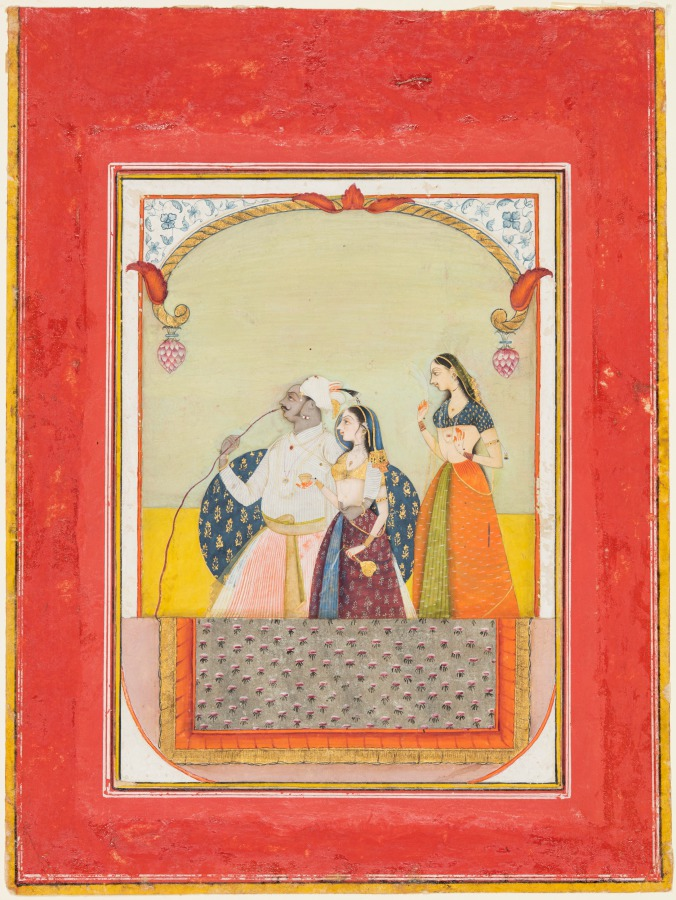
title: Maharaja Shri Anand Singh-ji and His Consort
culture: Northwestern India, Rajasthan, Rajput Kingdom of Bikaner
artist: Ustad Murad (Indian, active 1700s)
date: 1729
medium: Gum tempera, silver, and gold on paper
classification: Painting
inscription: sabī māhārājā śrī ānada sagaha jī rī ustai murāda nijara kīvī dīvālī rī saṃ[vata] 1786 mītī kāti suda 1 kīvī āṃhāṃmada rī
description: The artist used metallic paint to indicate the sumptuous materials of the carpet covered with roses that marks the place of the royal couple. The king affectionately slings one arm around the shoulders of his queen, who carelessly allows wine to flow out of the bottle. A gigantic indigo-and-gold cushion provides their backdrop, excluding their attendant. The blue and white arabesques in the spandrels—triangular spaces above the arch—point to the couple’s international sophistication; the elite in northwestern India imported blue-and-white Dutch tiles and Chinese porcelain.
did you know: The silver carpet marks the royal window where subjects can come to see him.